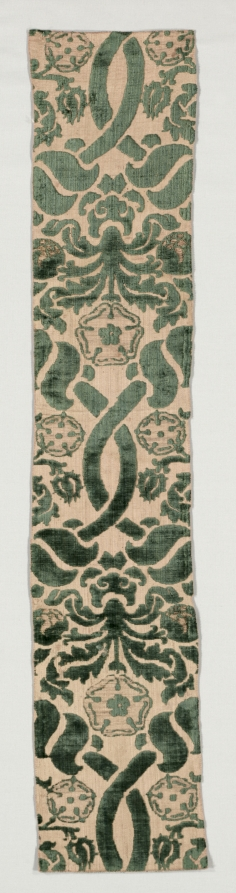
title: Fragment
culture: Italy, first half of 16th century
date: 1500–1550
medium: brocaded silk velvet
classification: Velvet